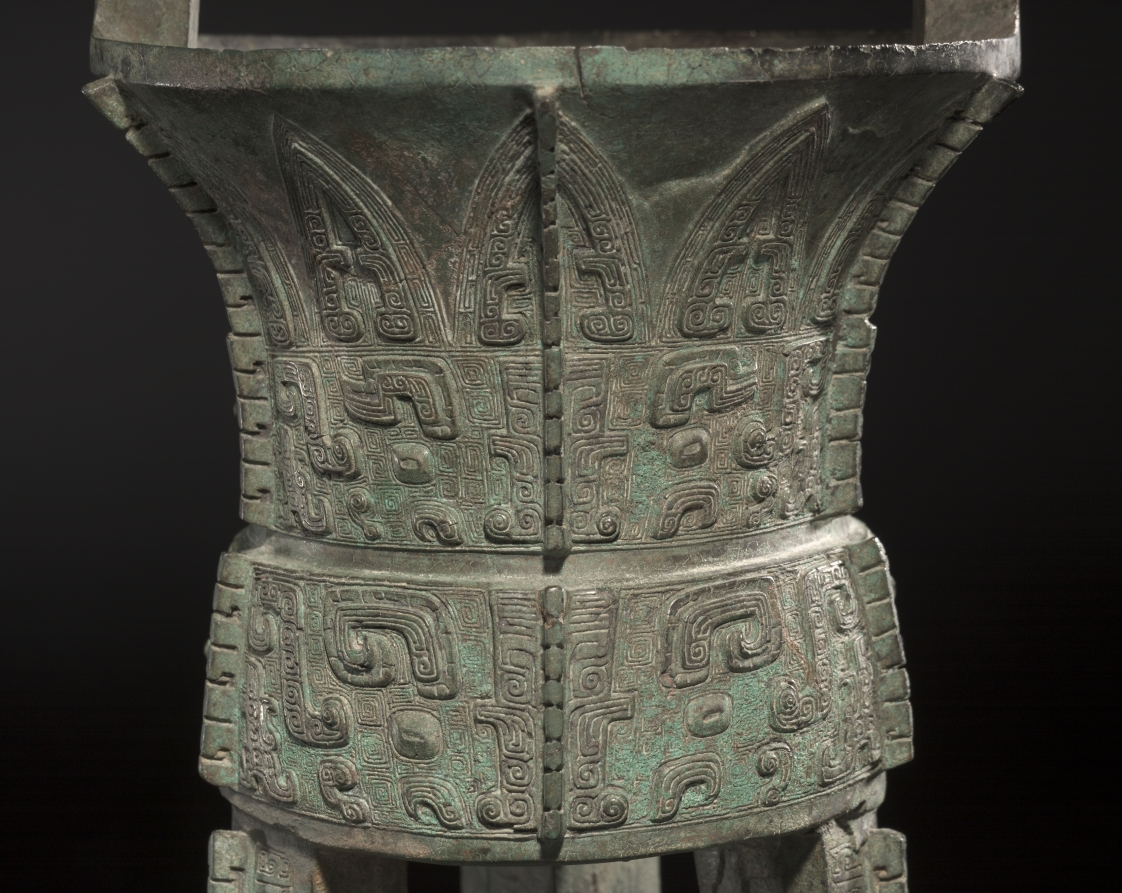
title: Wine Vessel (Jia)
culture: China, Shang dynasty (c. 1600–c. 1046 BCE), Anyang phase (c. 1250–1046 BCE)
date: c. 1250–1046 BCE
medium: bronze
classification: Metalwork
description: This large wine vessel (or jia) is among those very rare, monumental pieces uncovered from Anyang, the last royal capital of the Shang dynasty (c.1700–c.1100 BCE). Probably very few monumental bronze vessels were ever made; each of them must have cost a fortune and was used to designate high-ranking (often royal) status. Even fewer have survived. This wine vessel was used for the ancestral rites of the Shang. Its three splayed legs supported the cup over a fire, suggesting that the wine might be heated. Offering wine and food to their departed ancestors was an essential ritual practice performed by the Shang royalty and aristocracy. The Shang people believed that their ancestors were able to intercede with the high god to confer fruitful harvests and victories in battles. Their ritual actions involved communication with the supernatural realm (and this was further supported by the practice of divination with the use of a tortoise shell or a cattle shoulder blade). Here, the animal mask on the bronze vessel stares frontally at the viewer and serves symbolically as a messenger of communication with the ancestors. It conjures up the potency of mystery, whereas the static monumentality of the bronze vessel lends an air of dignified solemnity to the ritual ceremony.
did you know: Ancient bronze vessels are ritual and religious in nature, linked inextricably to political legitimization, and are source materials for Chinese historiography and traditional antiquarianism.